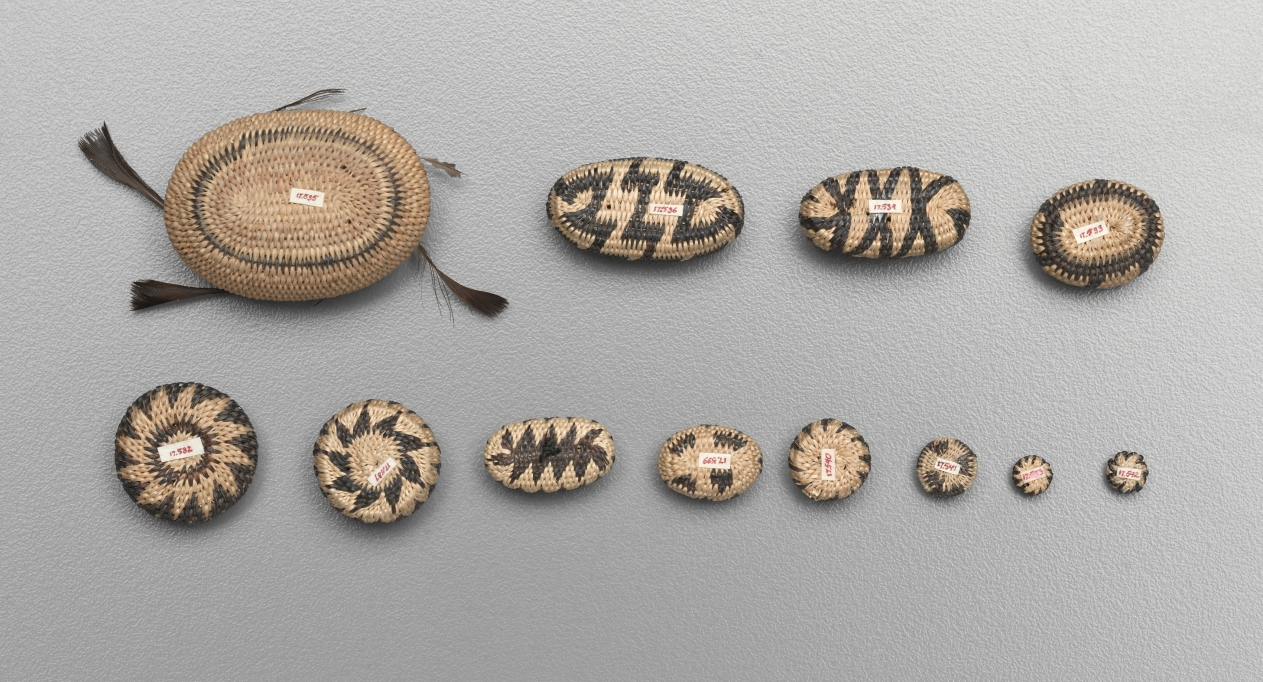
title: Miniature Rhomboidal Basket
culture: California, Pomo, 20th century (?)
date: Early 1900s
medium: coiled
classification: Basketry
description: Miniature baskets were made to demonstrate the basket-maker’s virtuoso skill, and these tiny marvels seem to be no exception—the smallest are just a few millimeters wide but still patterned. For such fine work, dexterity was required as much for preparation of materials as for weaving.